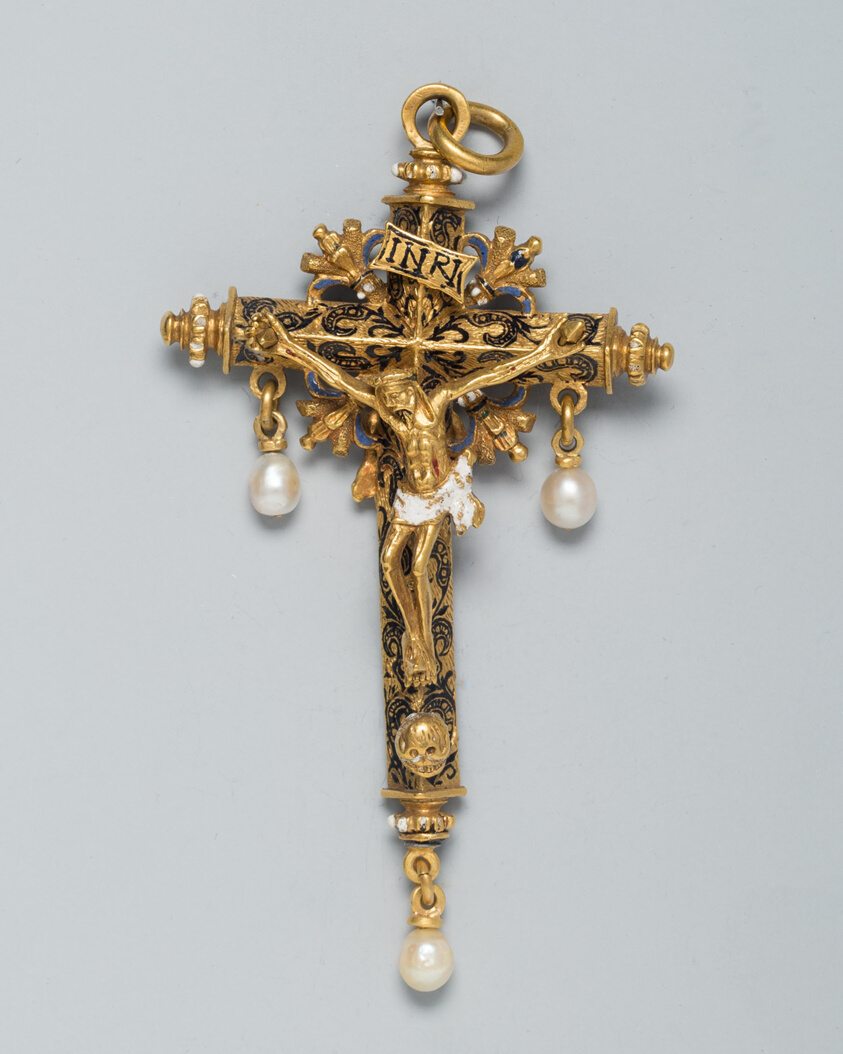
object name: Costume and Accessories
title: Double-Sided Crucifix Pendant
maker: Spanish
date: c. 1575-c. 1600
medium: Gold, enamel, and pearls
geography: Spain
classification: pendant (jewelry); jewelry; european decorative arts; costume